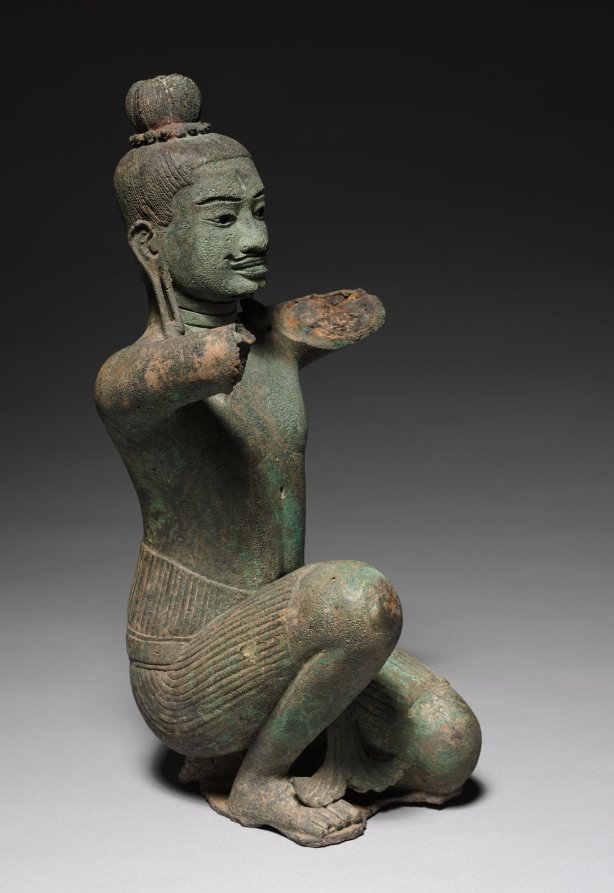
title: Kneeling Male Figure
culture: Cambodia, Angkor, Baphuon, Baphuon period, 1000s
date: 1010–80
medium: bronze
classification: Sculpture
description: The third eye in the forehead indicates that this figure identified himself with Shiva, but his kneeling stance with hands raised in a gesture of adoration indicates that he is a devotee of Shiva, who has taken on aspects of the god's physical appearance. The style of the lower garment with the low-slung belt is typical of work from the so-called Baphuon period of Khmer sculpture, like the stone standing image to the left. The eyes, eyebrows, moustache, and beard were once inlaid with silver.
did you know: This bronze figure was cast using the lost-wax (cire perdu) technique with the core armature inside.